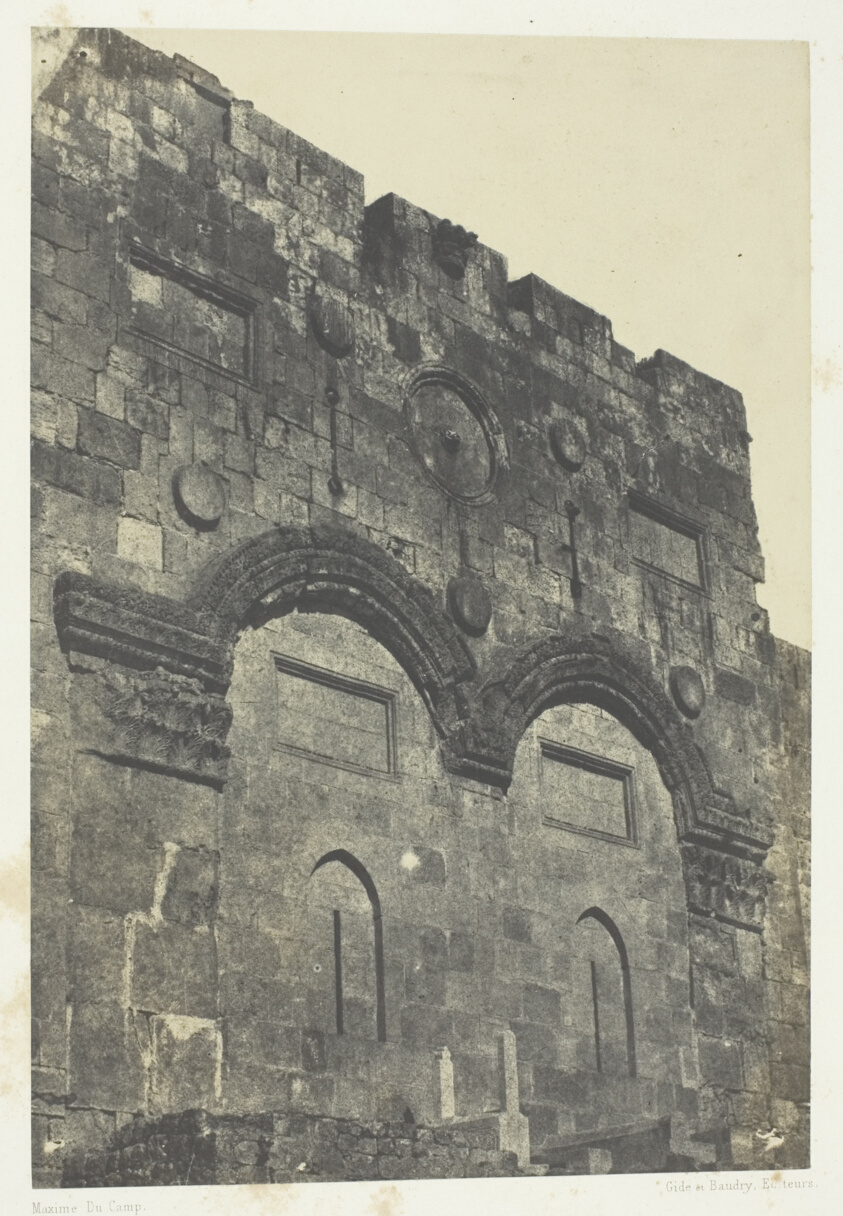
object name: Photograph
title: Jérusalem, Porte Dorée (Bab-El-Daharieh); Palestine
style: 19th century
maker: Maxime Du Camp (French, 1822–1894)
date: 1849/51, printed 1852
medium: Salted paper print, plate 118 from the album "Egypte, Nubie, Palestine et Syrie" (1852)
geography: France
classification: salted paper print; photographic process; photography; photograph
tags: Collected by Hugh Edwards, Egypte, Nubie, Palestine et Syrie